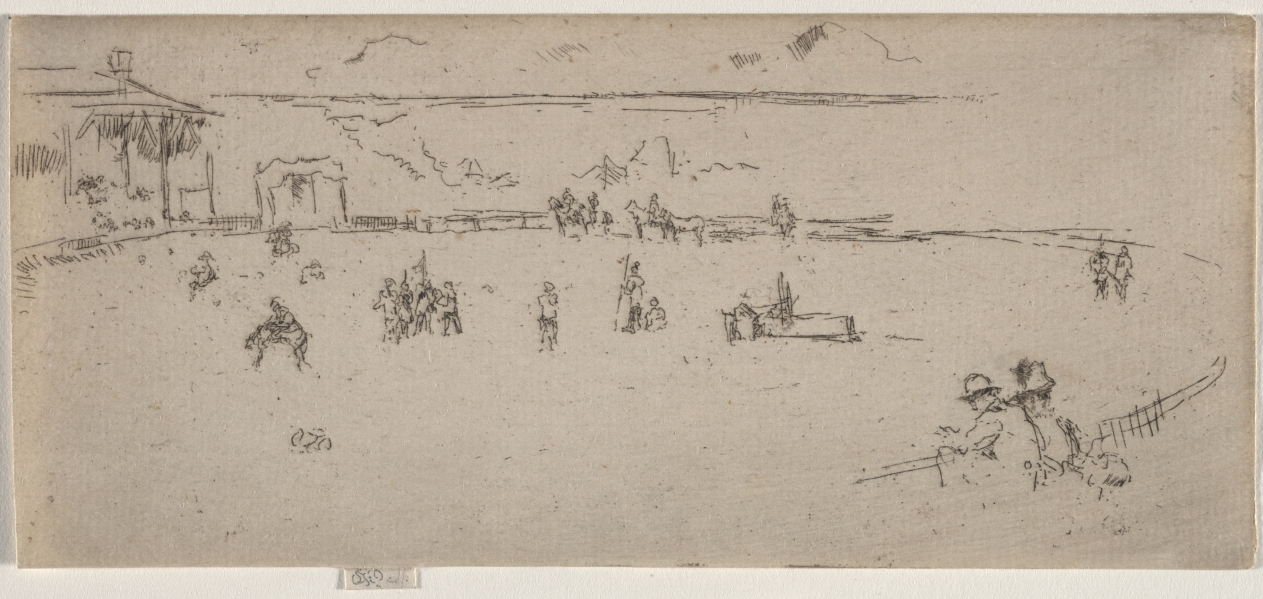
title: The Bucking Horse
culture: America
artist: James McNeill Whistler (American, 1834–1903)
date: 1887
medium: etching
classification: Print